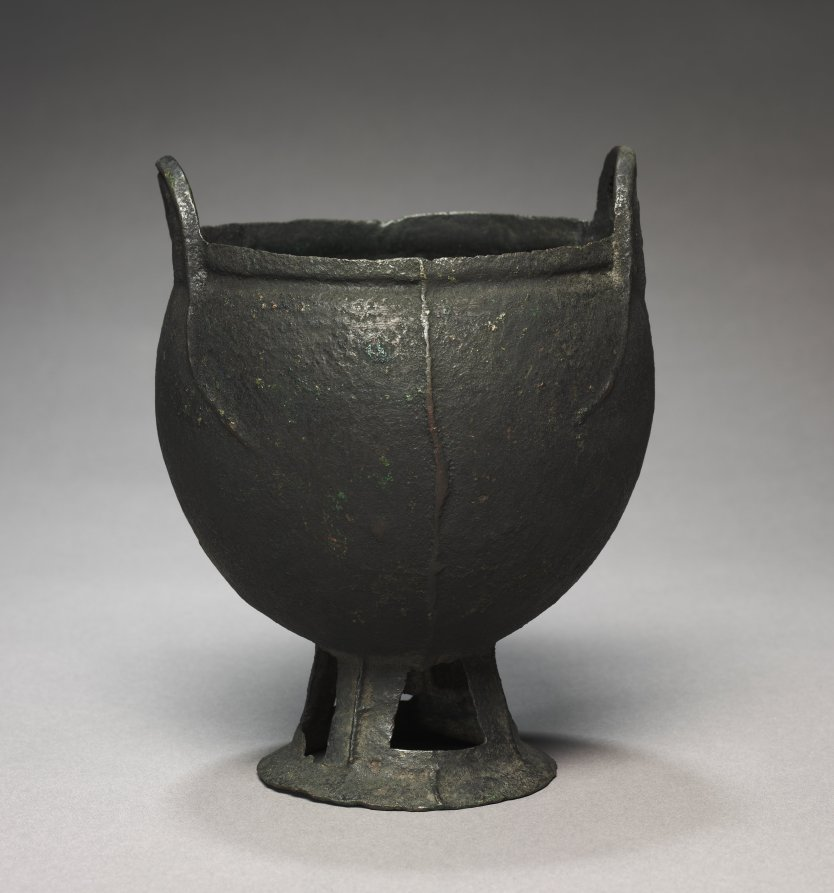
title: Cauldron on High Rounded Foot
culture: China, Ordos Region, Han dynasty (202 BCE–220 CE)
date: 200–1 BCE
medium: bronze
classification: Metalwork